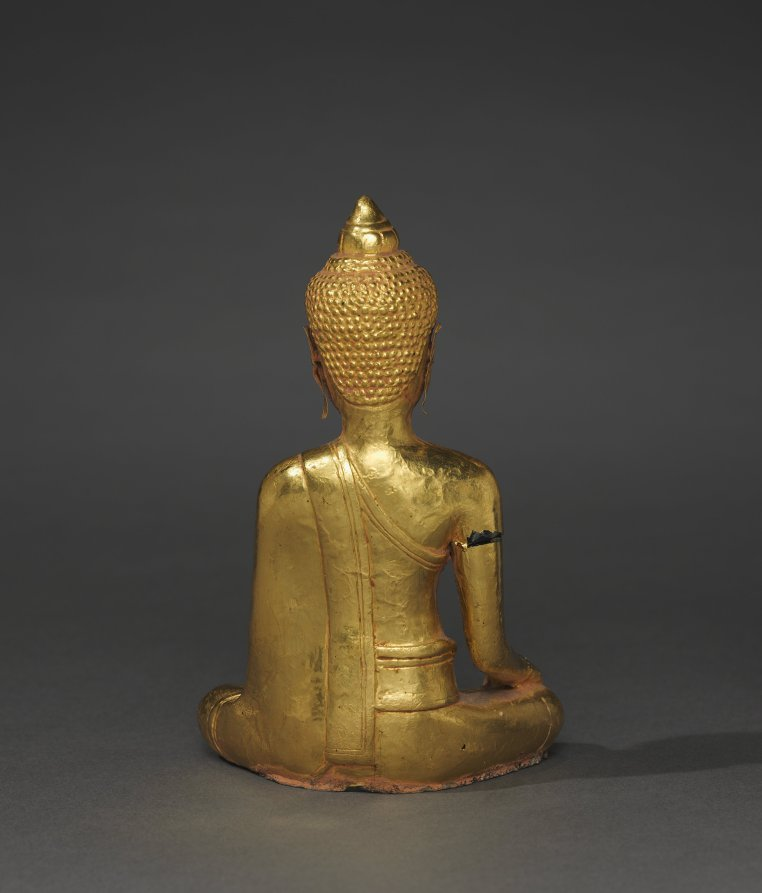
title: Seated Buddha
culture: Thailand, Ayutthaya, Wat Ratchaburana, 14th century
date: before 1424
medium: gold with resin core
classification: Sculpture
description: This pristinely modeled Buddha was fashioned from a sheet of 24-karat gold, using the repoussé (hammering) technique. The figure is filled inside with a resin core. The style is typical of the last phase of Khmer art (800s–1400s), the Lapburi style, which combines characteristics of both Cambodian and Thai sculptural styles.